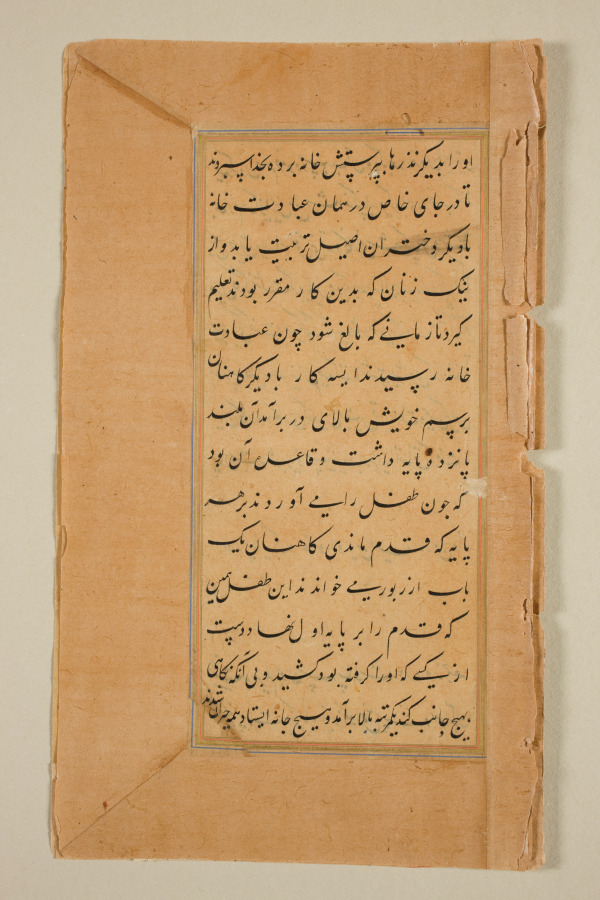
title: Text, Folio 8 (recto), from a Mirror of Holiness (Mir’at al-quds) of Father Jerome Xavier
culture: Mughal India, Allahabad, made for Prince Salim (1569–1627)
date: 1602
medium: Ink and gold on paper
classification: Manuscript